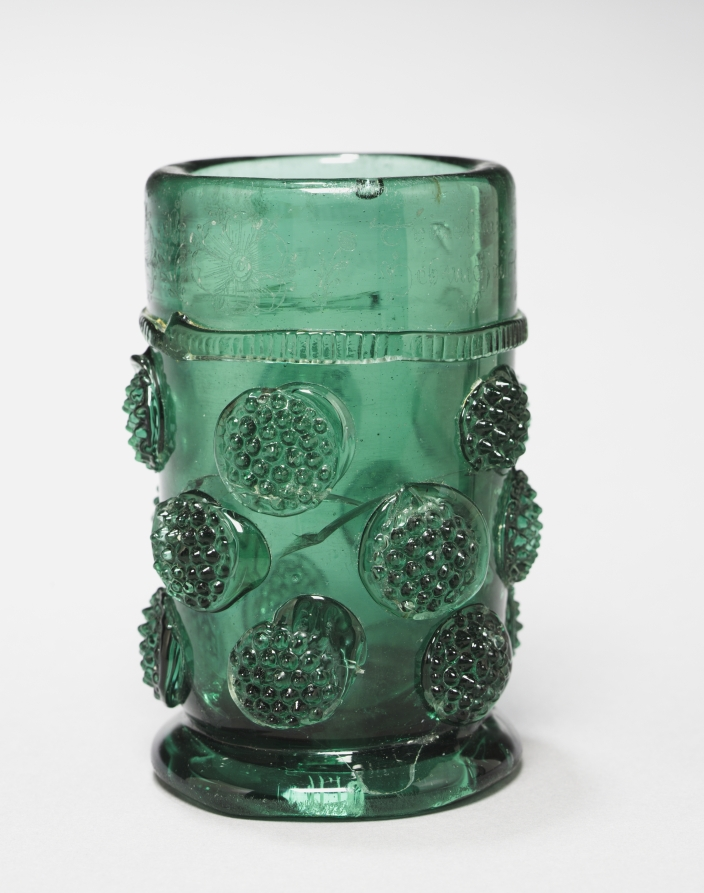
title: Beaker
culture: Germany, probably Saxony, 17th century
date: 1653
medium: green glass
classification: Glass